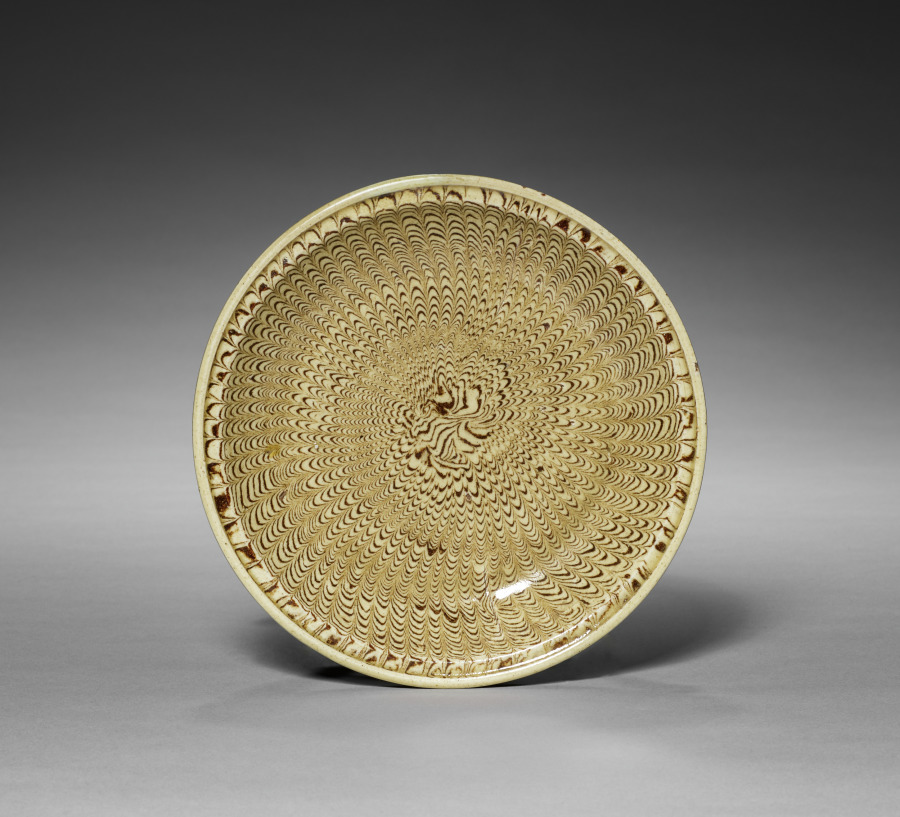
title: Flat Dish Made of Marbled Clay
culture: North or Central China, Northern Song (960–1127) or Jin dynasty (1115–1234)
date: 960–1234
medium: Stoneware with marbled clay and transparent glaze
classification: Ceramic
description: Using the marbling technique, in which light- and dark-colored clays are kneaded together (jiaotai; 絞胎), this dish is entirely covered with a transparent glaze, further enhancing the contrasting effect. The mixed clay technique had been used in northern China since the Tang dynasty (618–906), suggesting that potters may have attempted to imitate the effect of precious marbled glass from the ancient Near East that was traded via the Silk Road. The Keithleys acquired this dish to accompany the monumental ink drawing Poetic Pattern of Song Ware (CMA 2020.146) in their collection, that was inspired by such a ceramic.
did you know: This dish features lively contrasting black and beige clay marbling underneath a transparent glaze.